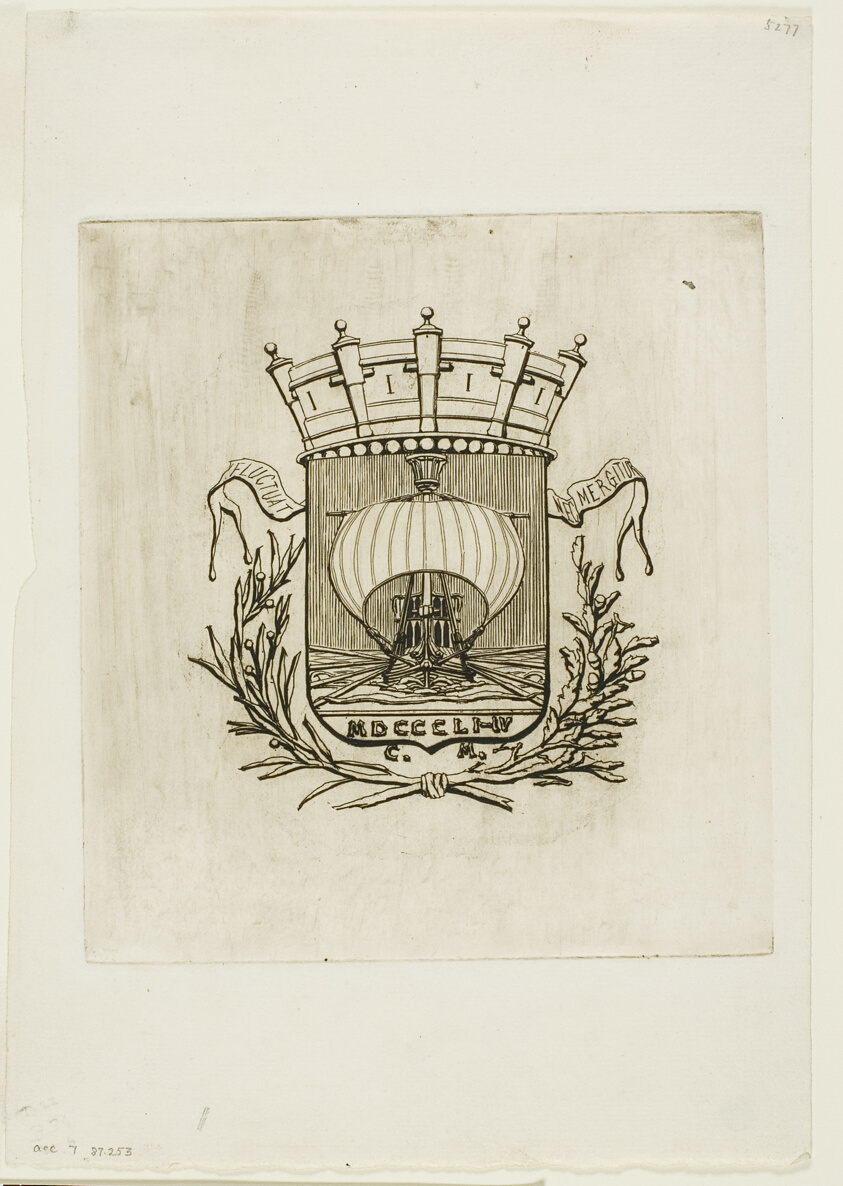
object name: Print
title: It Rocks but is Not Sunk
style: 19th century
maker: Charles Meryon (French, 1821-1868)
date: 1854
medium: Etching on ivory laid paper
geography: France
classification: etching; print; prints and drawing